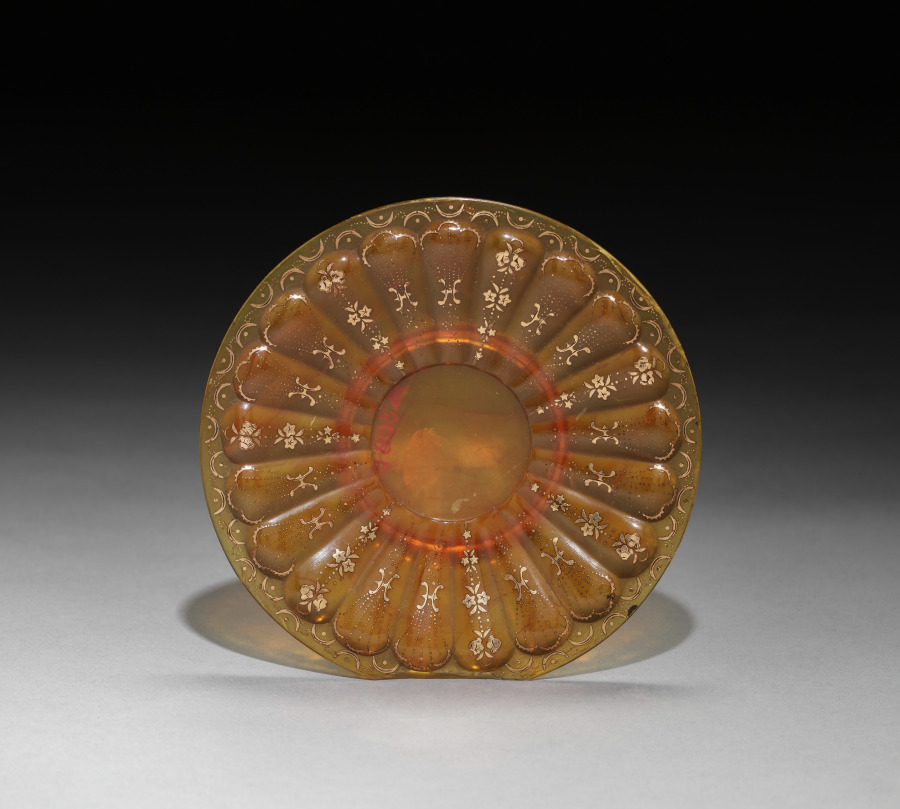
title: Saucer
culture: France, 18th century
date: c. 1730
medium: amber decorated with inlaid gold and mother-of-pearl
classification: Miscellaneous